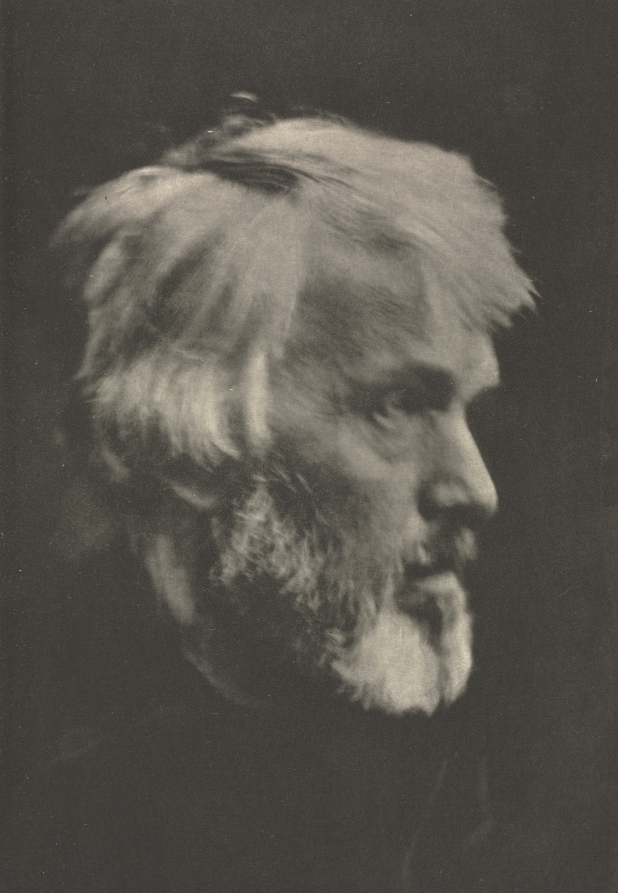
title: Camera Work: Carlyle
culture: England, 20th century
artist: Julia Margaret Cameron (British, 1815–1879)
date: 1913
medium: photogravure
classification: Bound Volume